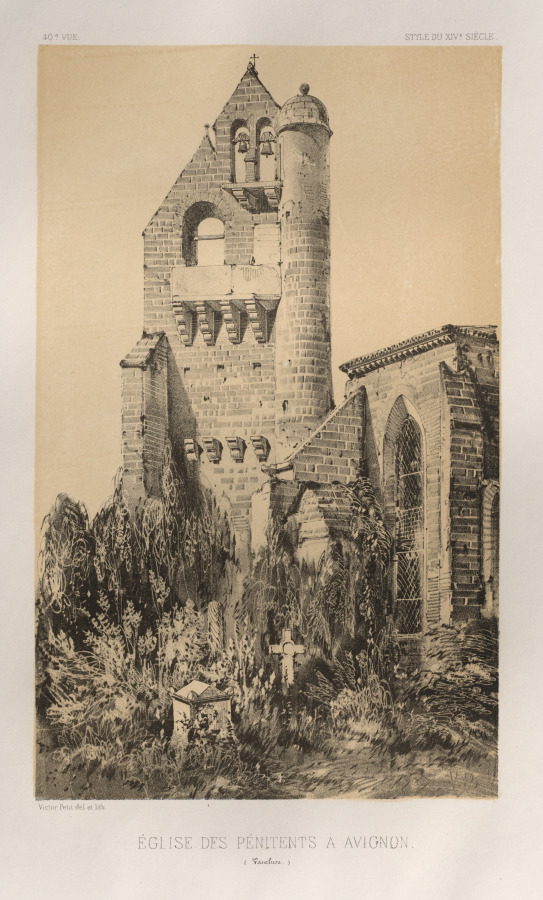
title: Architecture Pittoresque ou Monuments des xveme. Et xvieme. Siecles: Chateaux De France des XV et XVI Siecles: Pl. 40, Église Des Pénitents À Avignon (Vaucluse)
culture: France, 19th century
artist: Victor Petit (French, 1817–1874)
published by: Charles Boivin (publisher and editor); Lith de Godard a Paris (printer)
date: 1860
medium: lithograph with tint stone, from portfolio of 100 lithographs with tint stone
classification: Print